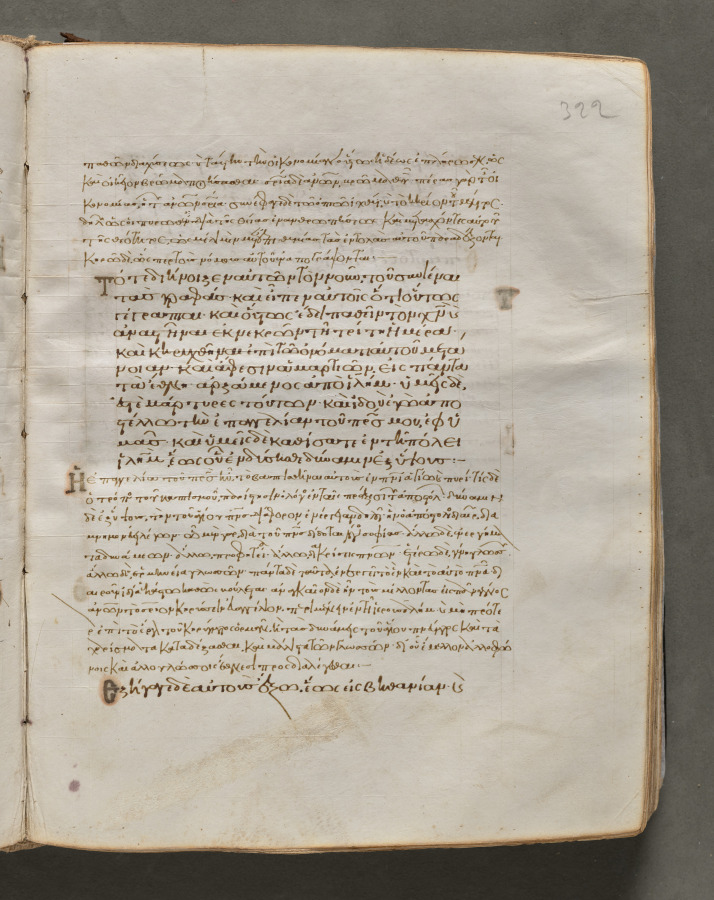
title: Text, folio 322 (recto), from a Gospel Book with Commentaries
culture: Byzantium, Constantinople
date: c. 1000–1100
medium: ink, tempera, and gold on vellum; leather binding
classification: Bound Volume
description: Each of the four gospels in this book opens on a page with brilliantly illuminated borders depicting the author of the text as well as birds—principally peacocks, symbols of the immortality of the soul—and fountains, representing the fountain of life and the salvation of the soul. This volume consists of 428 leaves with texts in Greek. Its level of sophistication suggests that it was probably written and decorated in a monastery in Constantinople.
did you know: Gospel books were carried in procession through Byzantine churches.